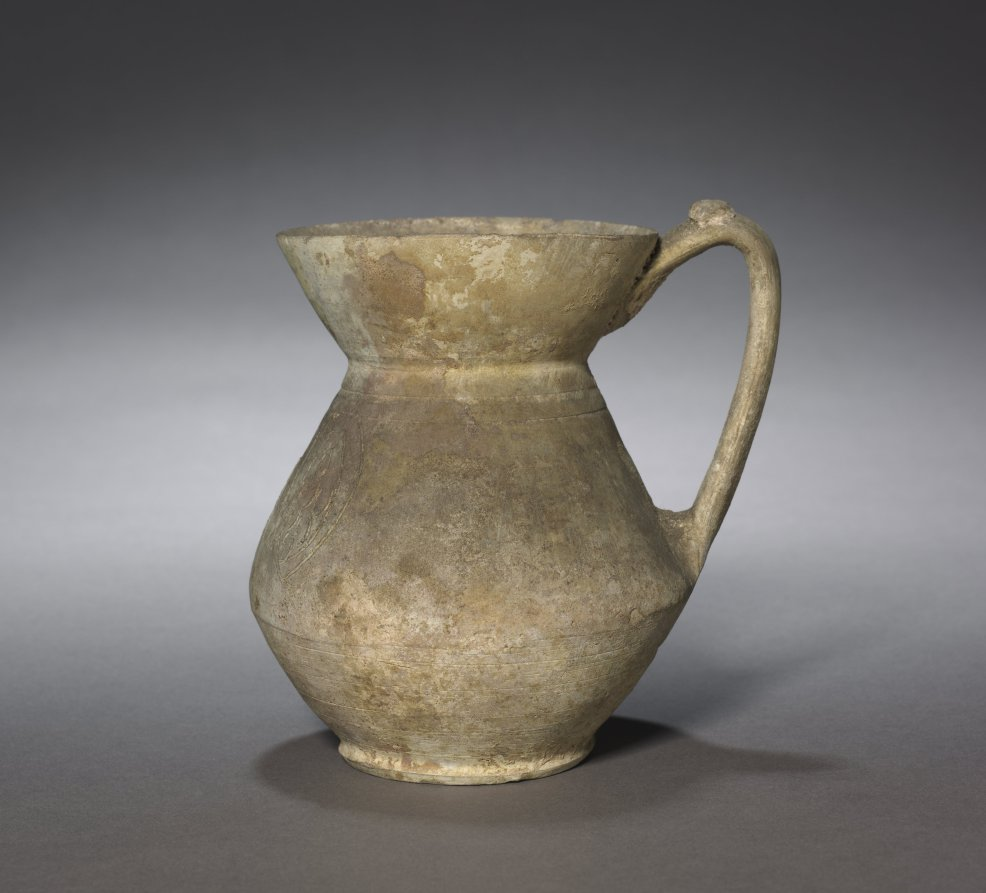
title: Jug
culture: Iran, Samanid period, 900s–1100s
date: 900s–1100s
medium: earthenware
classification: Ceramic